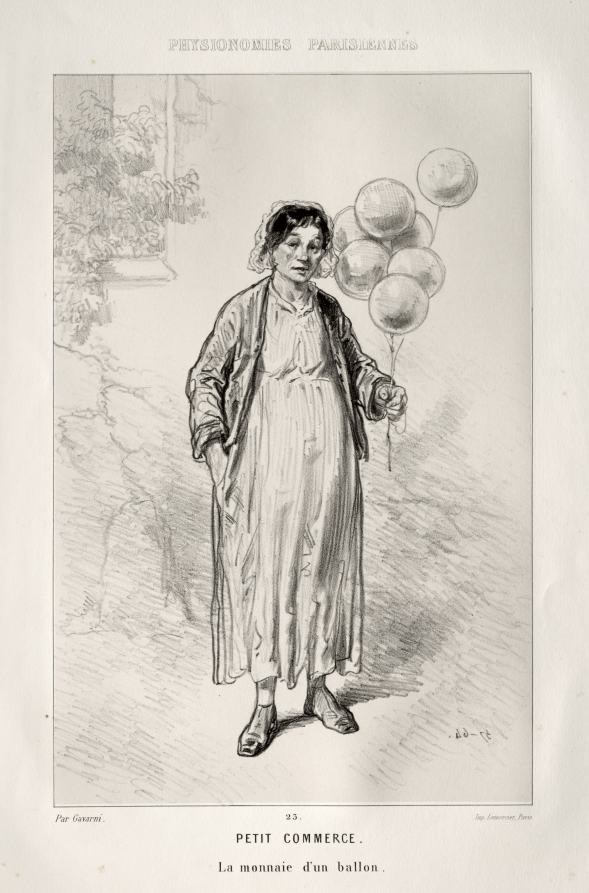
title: Petit Commerce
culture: France, 19th century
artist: Paul Gavarni (French, 1804–1866)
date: c. 1857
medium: lithograph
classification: Print